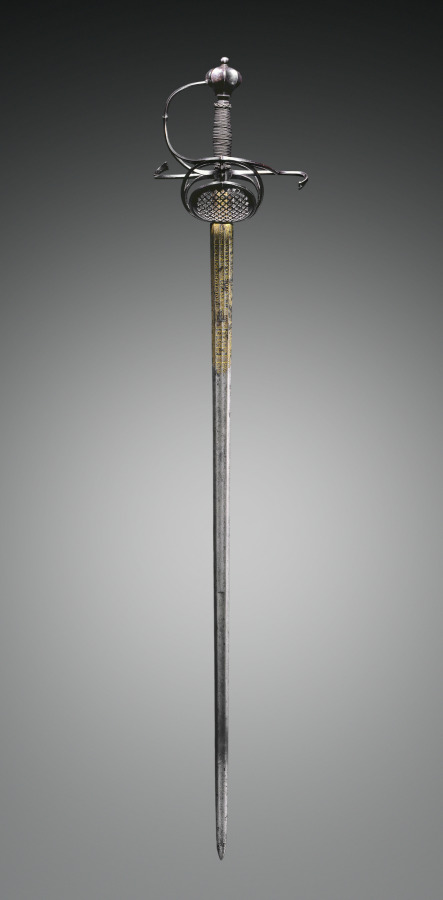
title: Rapier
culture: Germany, Solingen, 17th century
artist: Clemens Horn (German, 1586–1617)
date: c. 1620–30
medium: steel, blued and gilded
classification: Arms and Armor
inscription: NEC TEMPARE NEC TIMIDE / INTER ARMA SILENT LEGE / VERITATEM DILIGE ET PUGNA PRO PATRIA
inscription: Unicorn Head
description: This weapon has an especially handsome configuration of hilt, pommel, quillons, and guard. The blade is also very finely wrought and bears the mark (a unicorn head) of the German swordsmith, Clemens Horn, of Solingen, a town near Düsseldorf. The Latin inscription on the blade reads in translation: "Neither without cause, nor fearfully/Between arms and silent law/ Prize truth and the fight for one's country."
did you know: The "Pappenheimer" hilt seen here is named after Count Pappenheimer (1594-1632) who popularized the style which offered more protection to the hand with its large pierced plates.